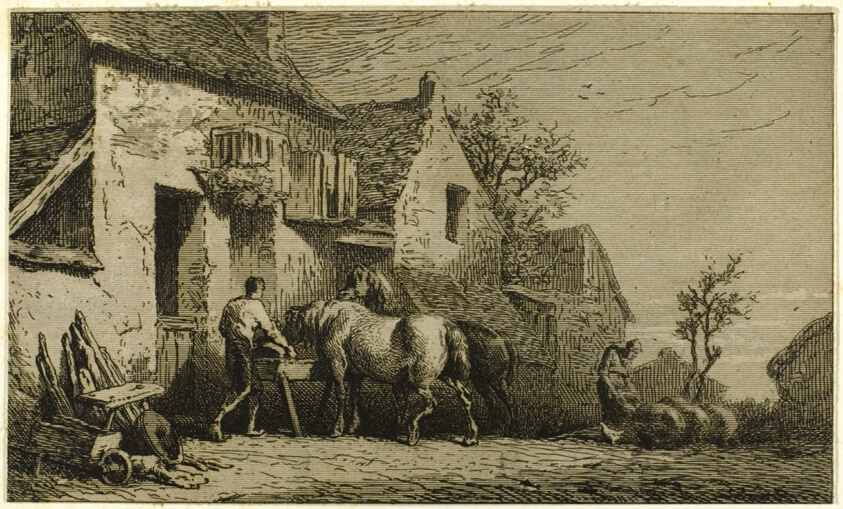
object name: Print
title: Entrance to an Inn, with Stable Boy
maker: Charles Émile Jacque (French, 1813-1894)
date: 1850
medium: Etching and engraving on light gray China paper, laid down on ivory wove paper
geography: France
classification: etching; print; prints and drawing